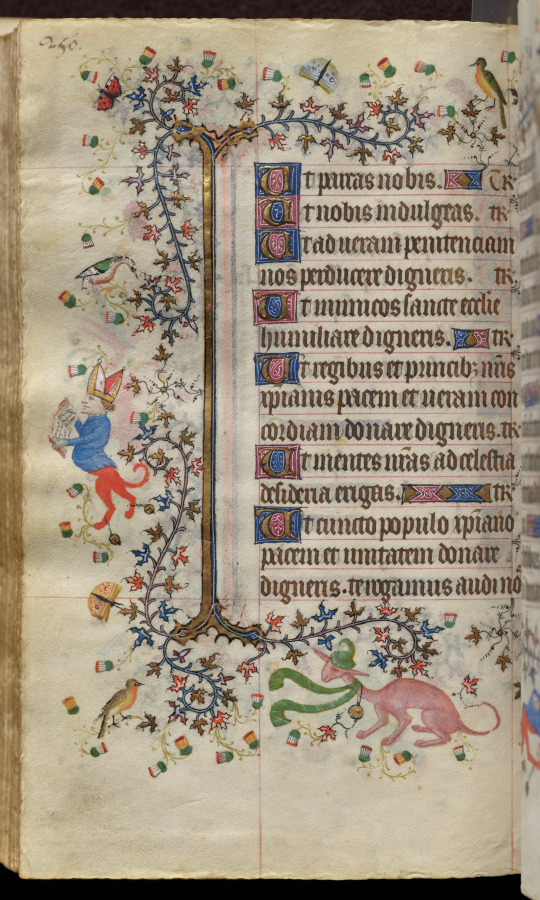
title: Hours of Charles the Noble, King of Navarre (1361-1425): fol. 125v, Text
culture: France, Paris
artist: Master of the Brussels Initials and Associates (French)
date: c. 1405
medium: ink, tempera, and gold on vellum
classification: Bound Volume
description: This precious volume was obviously highly prized by its owner, the French-born King of Navarre, who had his coat of arms painted on no less than twenty folios. Rather than directly commissioning this manuscript from a specific workshop, it seems that Charles the Noble acquired his book of hours -- perhaps ready-made for the luxury market -- while on a trip to Paris in 1404-05. A collaborative effort, six painting styles are evidenced within the pages of this codex, those of two Italians, two Frenchmen, and two Netherlanders. The painter who was responsible for the planning and decoration of the book, and who produced seventeen of the large miniatures, was a Bolognese artist known as the Master of the Brussels Initials. His principal assistant, responsible for most of the borders, was a Florentine who signed his name "Zecho" da Firenze on folio 208 verso.